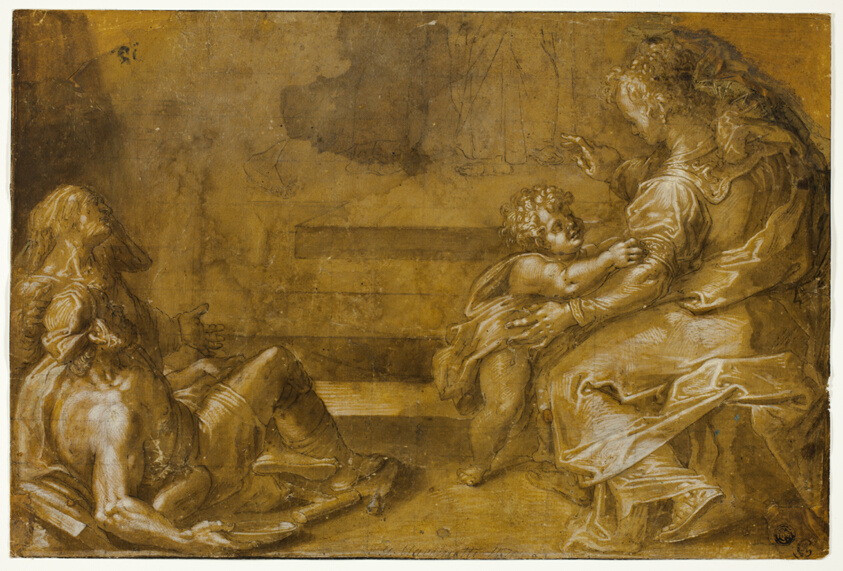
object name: Drawing and Watercolor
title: Two Reclining Beggars, and Seated Mother and Child, at Foot of Steps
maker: Girolamo Macchietti, after; Italian, c. 1535-1592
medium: Pen and black ink, with brush and brown and gray wash, heightened with lead white, with traces of graphite, on laid paper prepared with ocher wash, squared in graphite, laid down on cream laid paper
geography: Italy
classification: ink and wash; drawings (visual works); prints and drawing